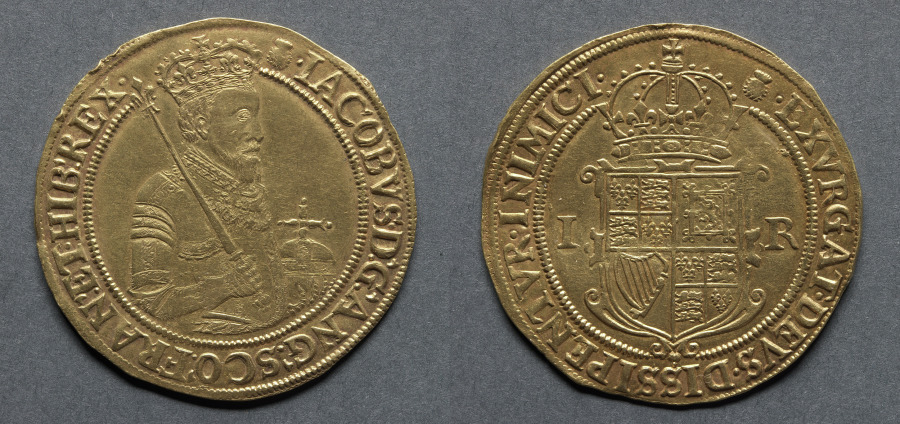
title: Sovereign: James I (obverse); Crowned Shield (reverse)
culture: England, James I, 1603-1625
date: 1603–4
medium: gold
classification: Coins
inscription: IACOBVS. D; G; ANG; SCO; FRAN; ET. HIB; REX.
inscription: EXVRGAT. DEVS. DISSIPENTVR. INIMICI.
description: The accession of James I to the throne of England brought about the union of the thrones of England and Scotland. This was duly recorded on the coinage, the royal arms on this rare piece now consisting of the arms of England (twice), Scotland, and Ireland. The English arms still contain the French lilies, though the last French possession, Calais, had been lost in the reign of Philip and Mary, 1544–58. On the reverse, SCO for Scotland was added to the royal title. The final unification of the two kingdoms did not take place until the 1706 Act of Union. James was in fact king of two separate countries and in Scotland, which had its own separate coinage till the act, where he is referred to as James VI. At first the coins were the same weight and fineness as those of Elizabeth I, but later a proclamation, due to "trade necessities," reduced the value by ten percent. In 1611, however, the value was restored.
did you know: The design of the reverse of this coin indicates it is from the beginning of the rule of James I in 1603.